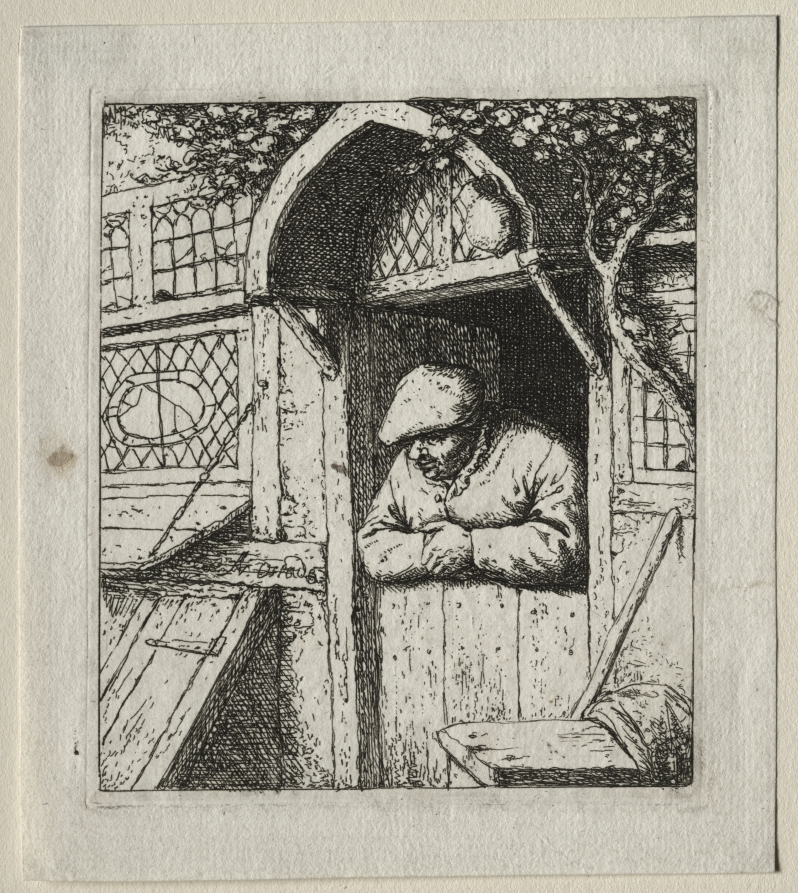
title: Peasant Leaning on His Doorway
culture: Netherlands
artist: Adriaen van Ostade (Dutch, 1610–1684)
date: c. 1653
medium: etching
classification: Print